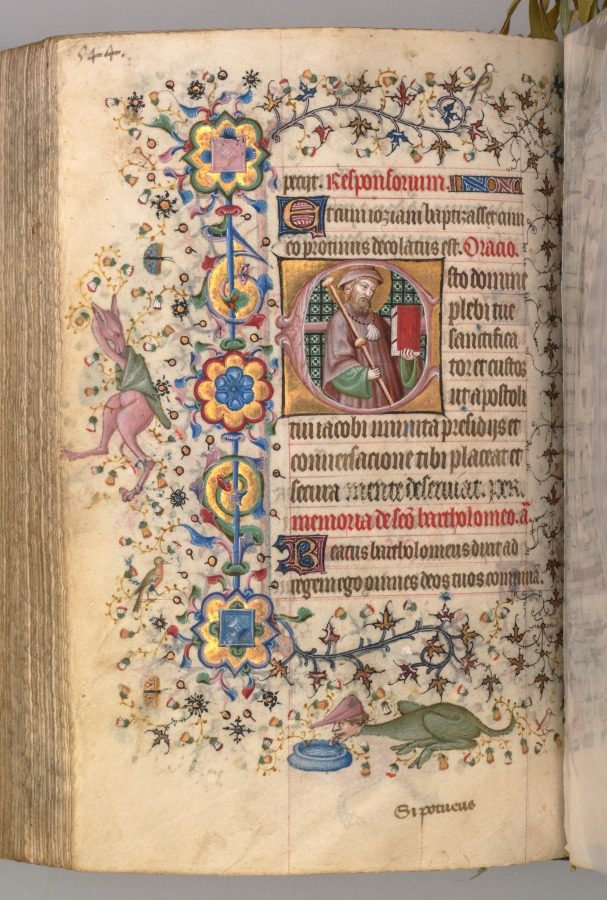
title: Hours of Charles the Noble, King of Navarre (1361-1425): fol. 266v, St. James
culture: France, Paris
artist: Master of the Brussels Initials and Associates (French)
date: c. 1405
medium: ink, tempera, and gold on vellum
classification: Bound Volume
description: This precious volume was obviously highly prized by its owner, the French-born King of Navarre, who had his coat of arms painted on no less than twenty folios. Rather than directly commissioning this manuscript from a specific workshop, it seems that Charles the Noble acquired his book of hours -- perhaps ready-made for the luxury market -- while on a trip to Paris in 1404-05. A collaborative effort, six painting styles are evidenced within the pages of this codex, those of two Italians, two Frenchmen, and two Netherlanders. The painter who was responsible for the planning and decoration of the book, and who produced seventeen of the large miniatures, was a Bolognese artist known as the Master of the Brussels Initials. His principal assistant, responsible for most of the borders, was a Florentine who signed his name "Zecho" da Firenze on folio 208 verso.